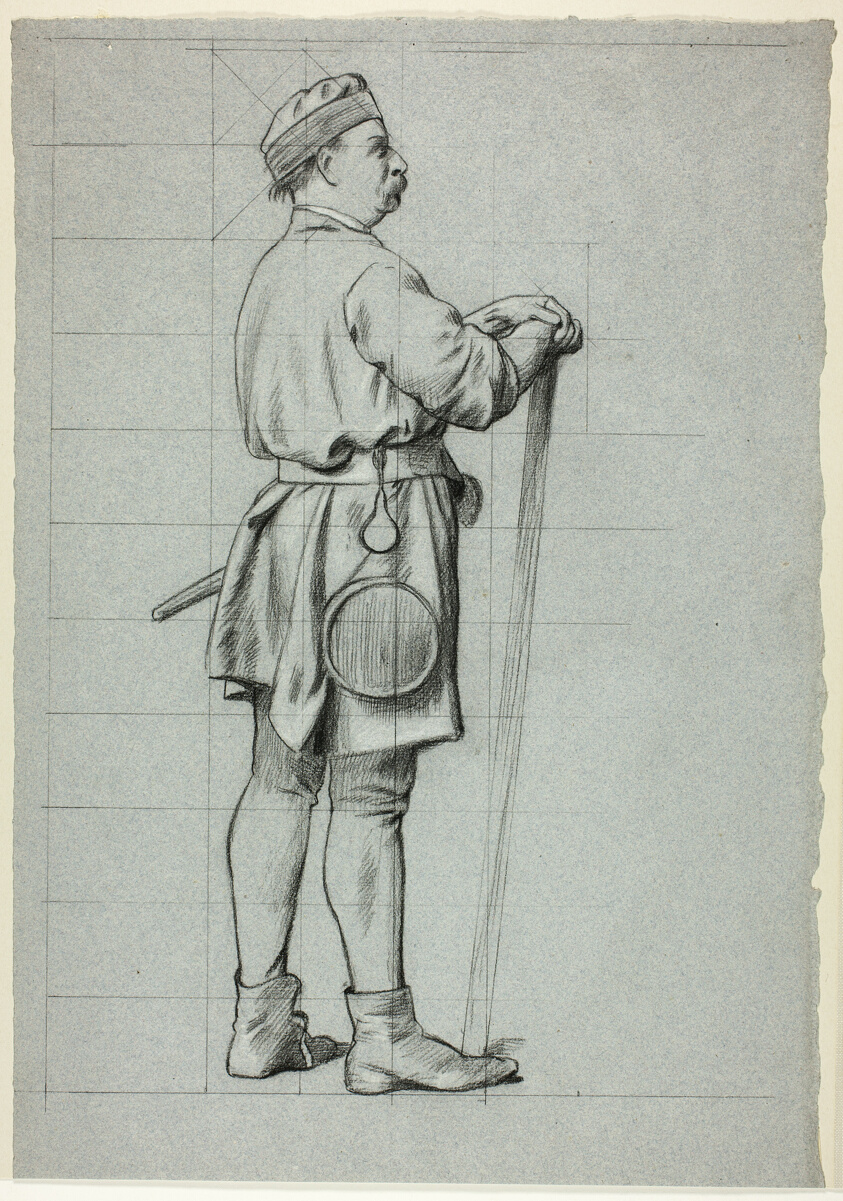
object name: Drawing and Watercolor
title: Standing Man with Hands Resting on Stick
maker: Henry Stacy Marks (English, 1829-1898)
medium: Black pastel, heightened with white pastel, squared in black pastel, on blue laid paper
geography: England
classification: pastel; drawings (visual works); prints and drawing